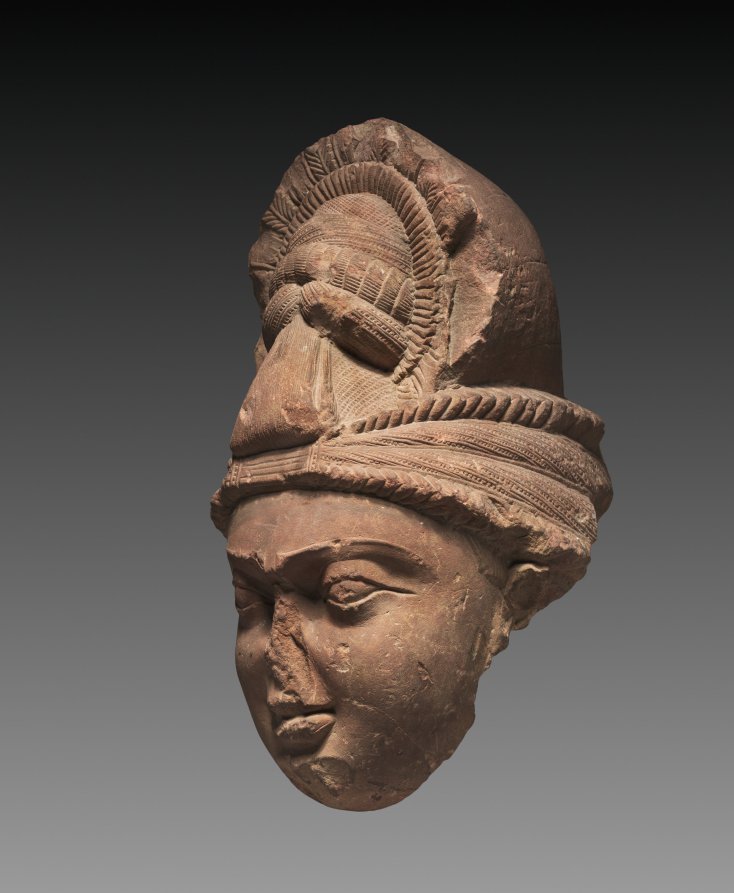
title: Head of a Bodhisattva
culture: India, Mathura, Kushan period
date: 75–early 100s CE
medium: red sandstone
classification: Sculpture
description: This monumental male head must have originally belonged to a larger-than-life Bodhisattva image. The imposing turban is of the type worn by royalty, divinities, and nobility during the Kushan period from the first through third century. The round, fleshy face, heightened by a subtle smile, retains the powerful quality of early Kushan and pre-Kushan images of nature divinities, known as yakshas.